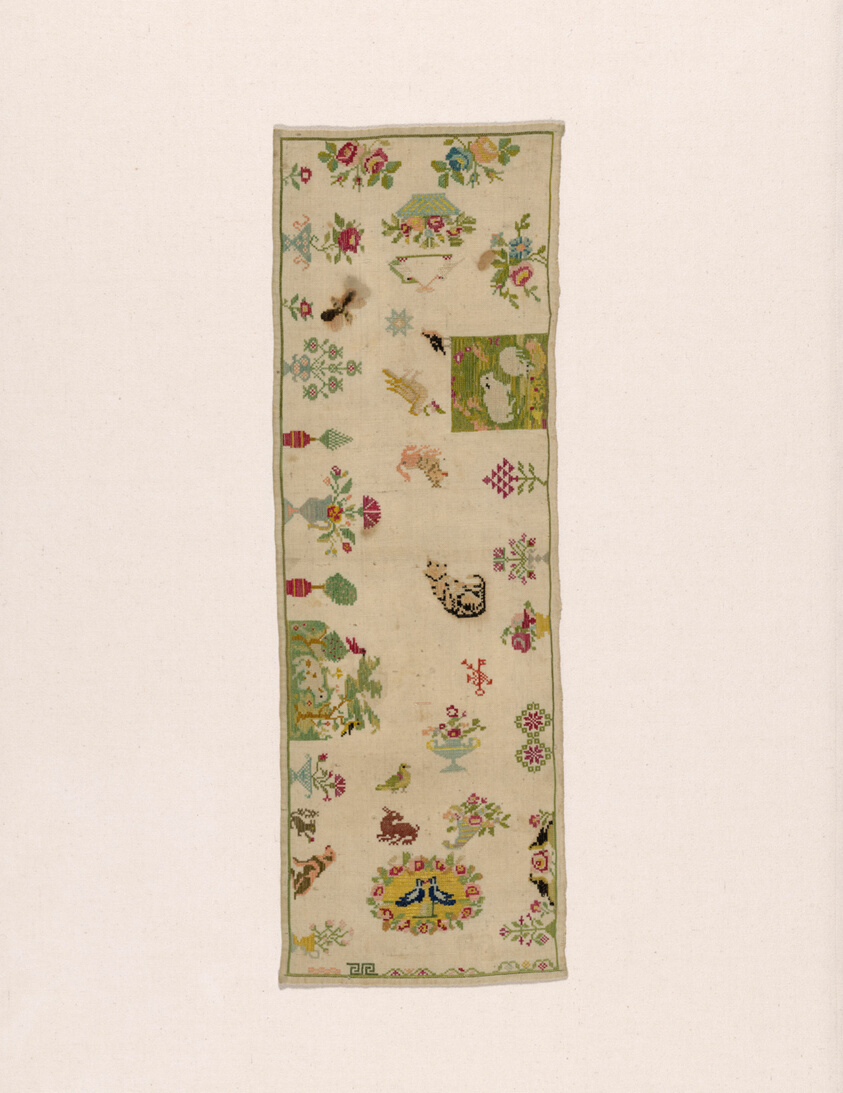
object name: Textile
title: Sampler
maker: Mexico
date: 1825/75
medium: Cotton, plain weave; embroidered with silk in cross and long-armed cross stitches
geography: Mexico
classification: textile; needlework (visual works)